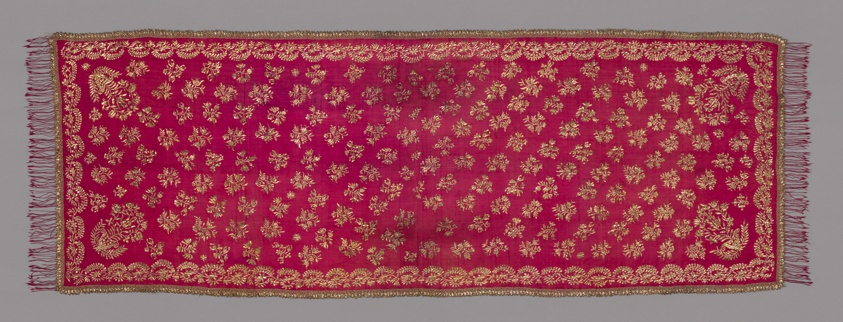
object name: Textile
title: Cover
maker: Turkey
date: 19th century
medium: Cover, flate gold embroidery on red silk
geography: Turkey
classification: textile; weaving; needlework (visual works)